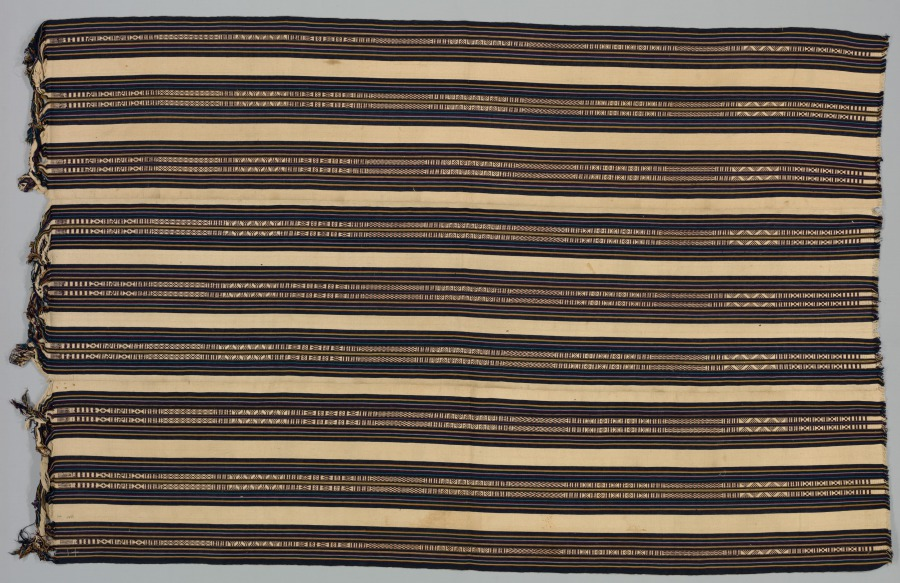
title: Textile Hanging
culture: Tibet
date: 1900–1915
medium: wool and cotton: warp faced plain weave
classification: Textile